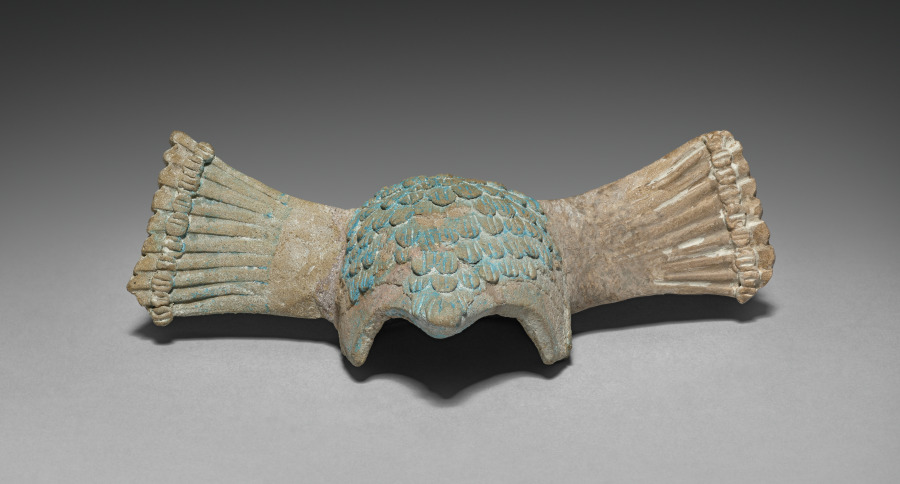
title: Warrior Figurine with Removable Headdress (headdress)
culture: Mexico, Yucatán, Jaina Island region, Campeche, Maya style (250-900)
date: 600–900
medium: earthenware with pigment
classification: Sculpture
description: The major offerings placed in the Maya graves of Jaina Island were ceramic figurines, some of Mesoamerica's finest, that depict deities and humans in a variety of roles. This removable headdress belongs to a warrior figure who once probably held weapons and wears either quilted cotton armor or the feathered uniform of a military order. We don't know why such figures are often pot-bellied.